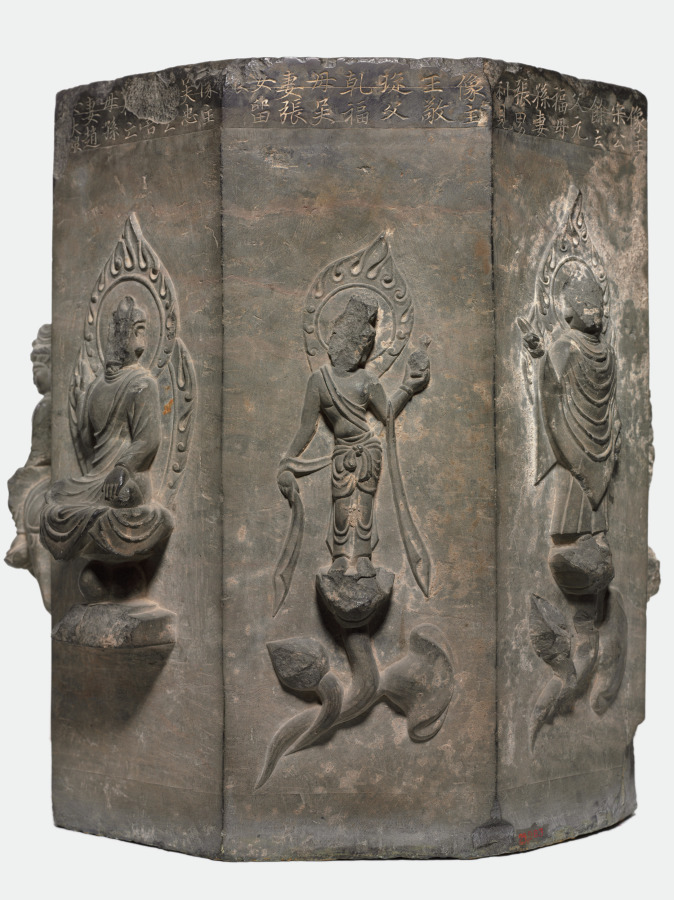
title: Section of a Dharani Pillar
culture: China, Tang dynasty (618-907)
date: 618–907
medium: limestone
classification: Sculpture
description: This octagonal stone pillar, with Buddhist figures carved on its eight sides, is part of a dharani pillar commissioned by Buddhist believers to pay tribute to the dead. The eight inscriptions seen here are eulogies dedicated by eight families to their deceased family members. Dharanis were a form of spell in Esoteric Buddhism said to possess supernatural power when being recited or carried and were incorporated into sutras, such as the Buddha Usnisa Vijaya Dharani Sutra. Dharani pillars, also called sutra pillars, became the dominant bearers of Usnisa Vijaya Dharani which supposedly helped sentient beings prolong life and destroy hardships of the eternal cycle of life and the realms of hell.